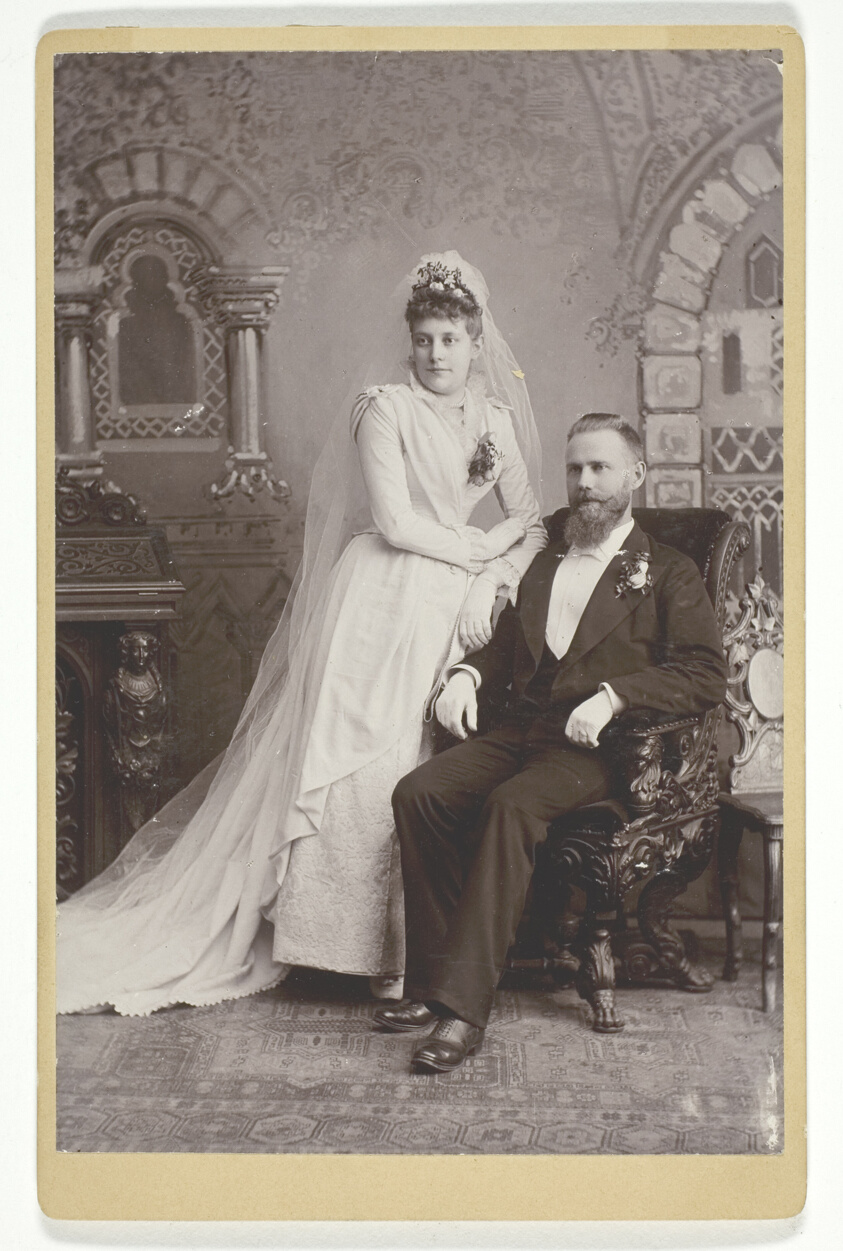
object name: Photograph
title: Wedding Portrait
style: 19th century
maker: L. Melander & Bro. (active late 19th century); Lewis M. Melander (American, born Sweden, died 1901); Silas Peter Melander (American, born Sweden, 1853–1929)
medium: Albumen print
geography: United States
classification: photography; photographic process; photograph